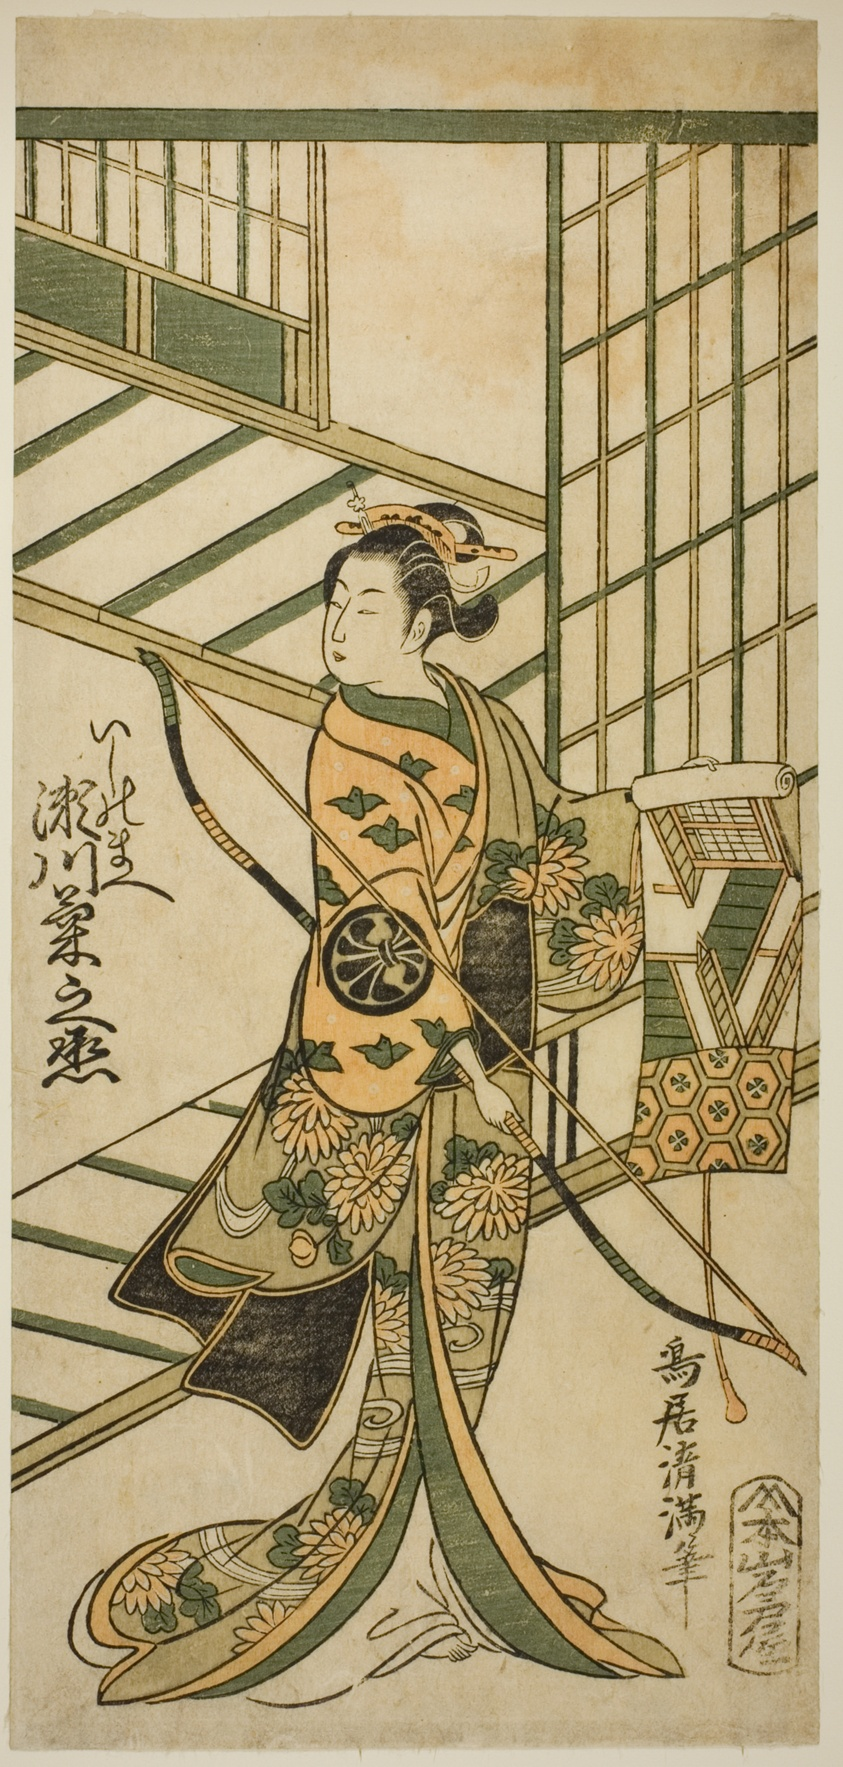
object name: Print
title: The Actor Segawa Kikunojo II as Ishi no Mae in the play "Hoshi Aikotoba Higashiyama no Sakae," performed at the Ichimura Theater in the ninth month, 1763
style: Japanese (culture or style)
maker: Torii Kiyomitsu I (Japanese, 1735–1785)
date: 1763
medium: Color woodblock print; hosoban, benizuri-e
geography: Japan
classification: woodblock print; print; asian art